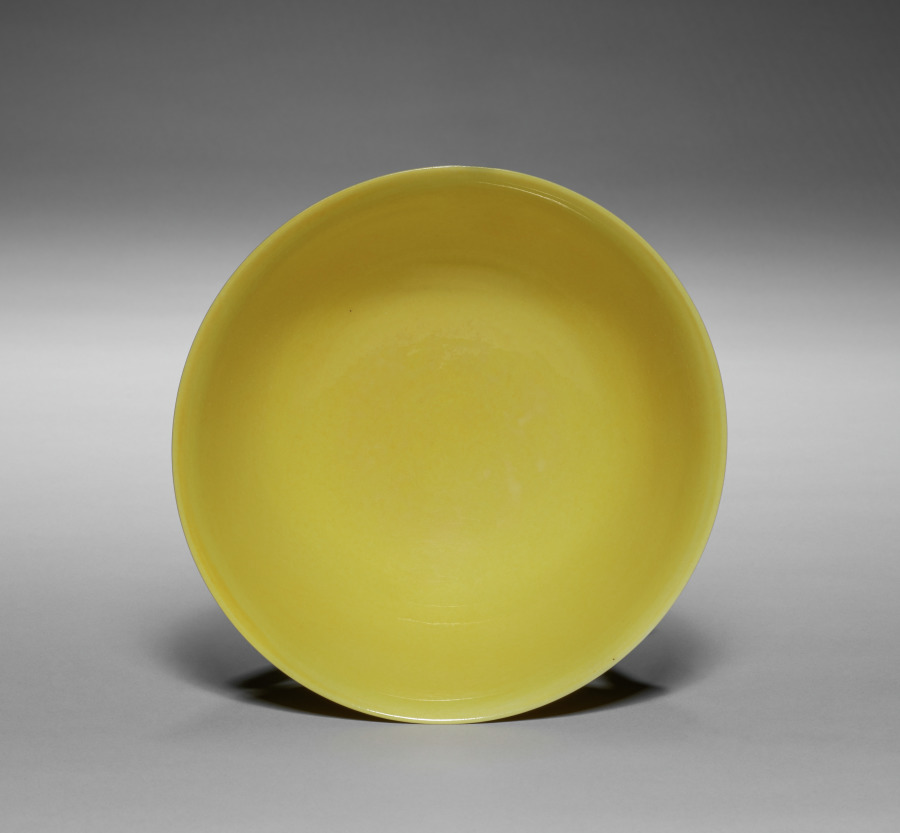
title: Yellow-Glazed Bowl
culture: China, Jiangxi province, Jingdezhen kilns, Ming dynasty (1368–1644), Zhengde mark and reign (1505–21)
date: 1505–21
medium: Porcelain with monochrome yellow glaze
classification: Ceramic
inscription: 大明正德年製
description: Monochrome yellow–glazed porcelain appears first during the Ming dynasty and is the combined result of technological advancement, the requirements of state rituals, and aspirations of taste. The base bears a mark of the Zhengde (正德) reign period, renowned for its high-quality imperial porcelain, and a pleasure-seeking emperor who died in his youth. Imperial marks were permitted to be applied only by Jingdezhen workshops affiliated with the court. Most scholars believe that yellow monochrome ware was reserved for the use of the imperial household or served as diplomatic gifts. The color is therefore often called “imperial yellow.”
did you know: Zhengde–marked bowls of this so-called imperial yellow type are also preserved in the National Palace Museum in Taipei and the Topkapi Saray, Istanbul, once the palace of the Ottoman sultans.